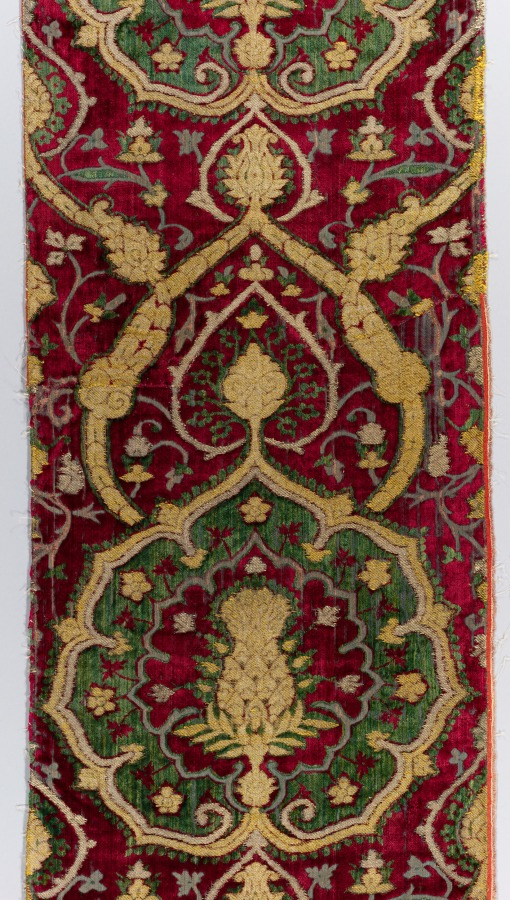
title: Brocaded Velvet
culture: Turkey, early 16th Century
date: c. 1500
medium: velvet: silk, brocaded with gold and silver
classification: Velvet